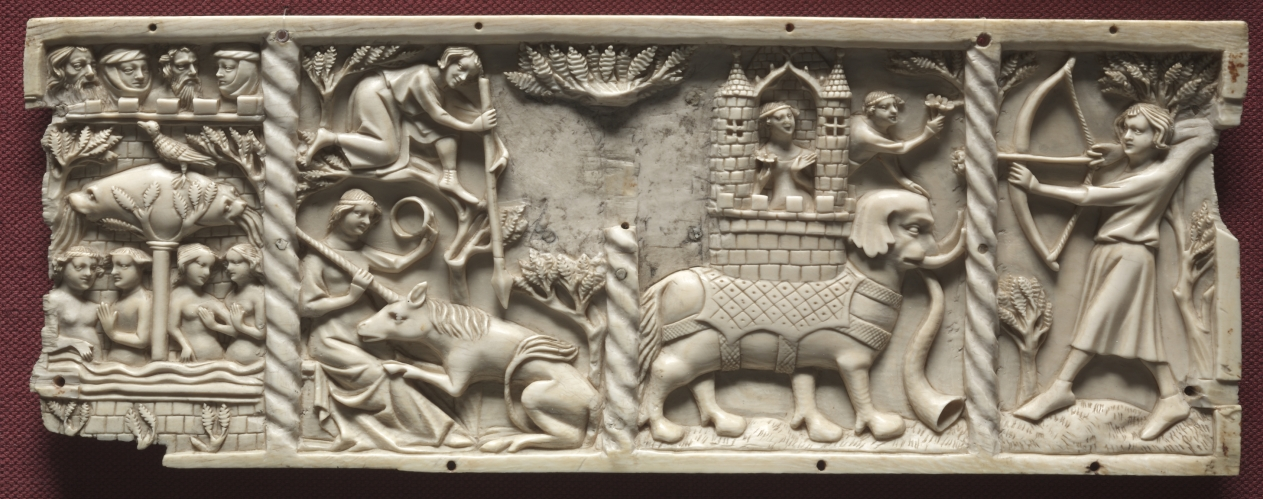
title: Panel from a Casket with Scenes from Courtly Romances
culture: France, Lorraine?, Gothic period, 14th century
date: 1330–1350 or later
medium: ivory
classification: Ivory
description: Among the most lavish and deluxe products of French ivory workshops of the 1300s were large caskets carved with elaborate scenes drawn from courtly romances. The panel shown here comes from such a casket. This side panel depicts scenes such as the fountain of youth and the unicorn hunt. These images suggesting chivalry, fertility, virginity, youth, and an idealized courtly love likely derive from manuscripts including the Roman de la Rose and the poems of Chrétien de Troyes. Such texts were often found within the libraries of the aristocracy, so the casket’s symbolic images would have been readily understood. Such caskets may have originally been gifts between a man and a woman. The expense of the material, ivory, suggests they were produced for an elite, aristocratic clientele.